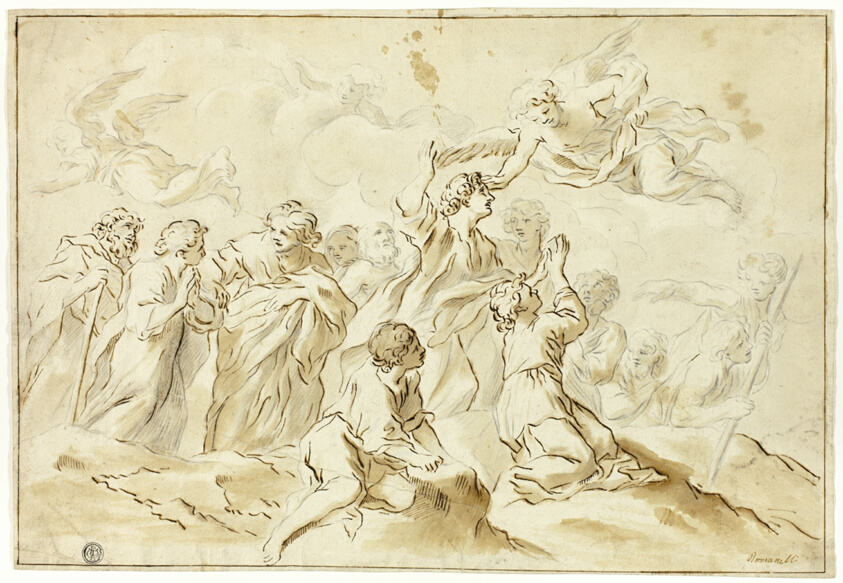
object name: Drawing and Watercolor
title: Blessed Ascending to Heaven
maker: Attributed to Giovanni Francesco Romanelli (Italian, 1610-1662); or Anton Domenico Gabbiani (Italian, 1652-1726)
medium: Pen and brown ink, with brush and brown wash, over black chalk, on cream laid paper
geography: Italy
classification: pen and ink drawings; drawings (visual works); prints and drawing